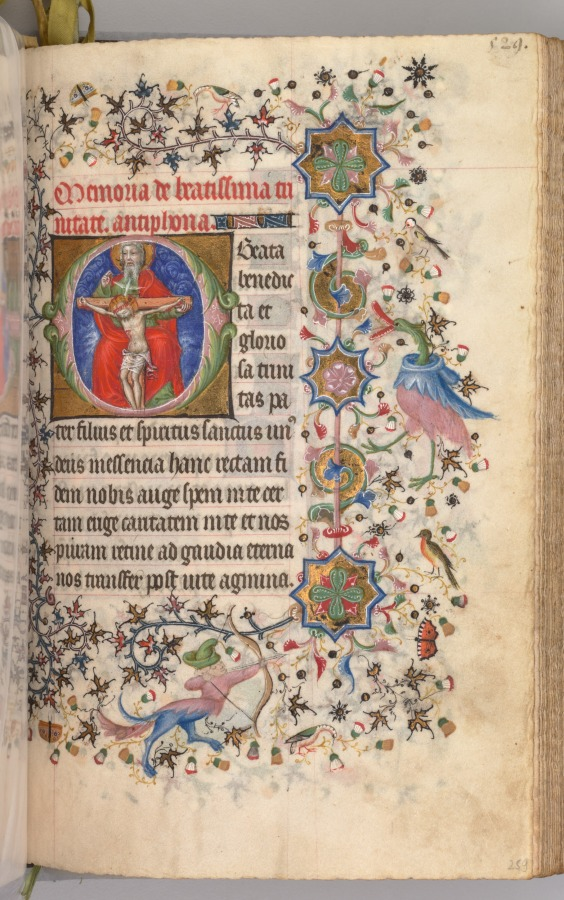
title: Hours of Charles the Noble, King of Navarre (1361-1425): fol. 259r, The Trinity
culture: France, Paris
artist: Master of the Brussels Initials and Associates (French)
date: c. 1405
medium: ink, tempera, and gold on vellum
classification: Bound Volume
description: This precious volume was obviously highly prized by its owner, the French-born King of Navarre, who had his coat of arms painted on no less than twenty folios. Rather than directly commissioning this manuscript from a specific workshop, it seems that Charles the Noble acquired his book of hours -- perhaps ready-made for the luxury market -- while on a trip to Paris in 1404-05. A collaborative effort, six painting styles are evidenced within the pages of this codex, those of two Italians, two Frenchmen, and two Netherlanders. The painter who was responsible for the planning and decoration of the book, and who produced seventeen of the large miniatures, was a Bolognese artist known as the Master of the Brussels Initials. His principal assistant, responsible for most of the borders, was a Florentine who signed his name "Zecho" da Firenze on folio 208 verso.